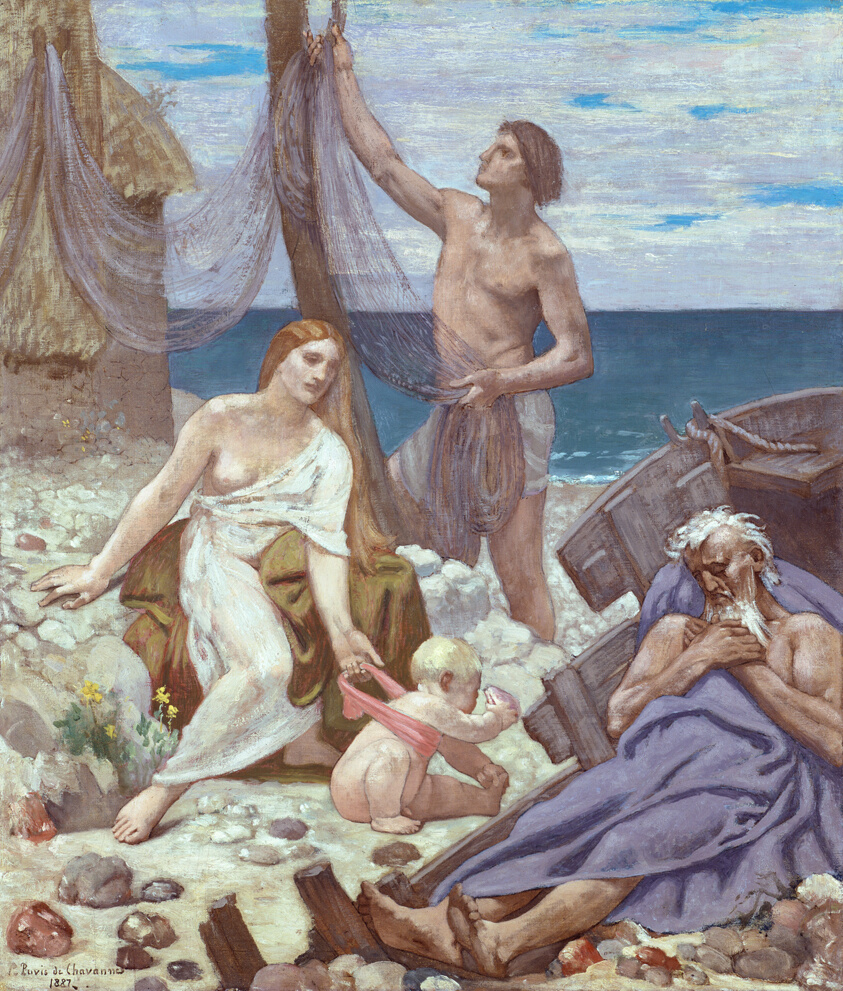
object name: Painting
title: The Fisherman's Family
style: nineteenth century, 19th century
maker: Pierre Puvis de Chavannes (French, 1824–1898)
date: 1887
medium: Oil on canvas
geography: France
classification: oil on canvas; paint; oil paintings (visual works); french; painting; european painting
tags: families, sleep, rocks, nature, mother, flowers, fisherman, fathers, elderly, clouds, boats, babies, plaid, mysteries/fantasies, water, women, children, men, Century of Progress, world's fairs, Chicago World's Fairs